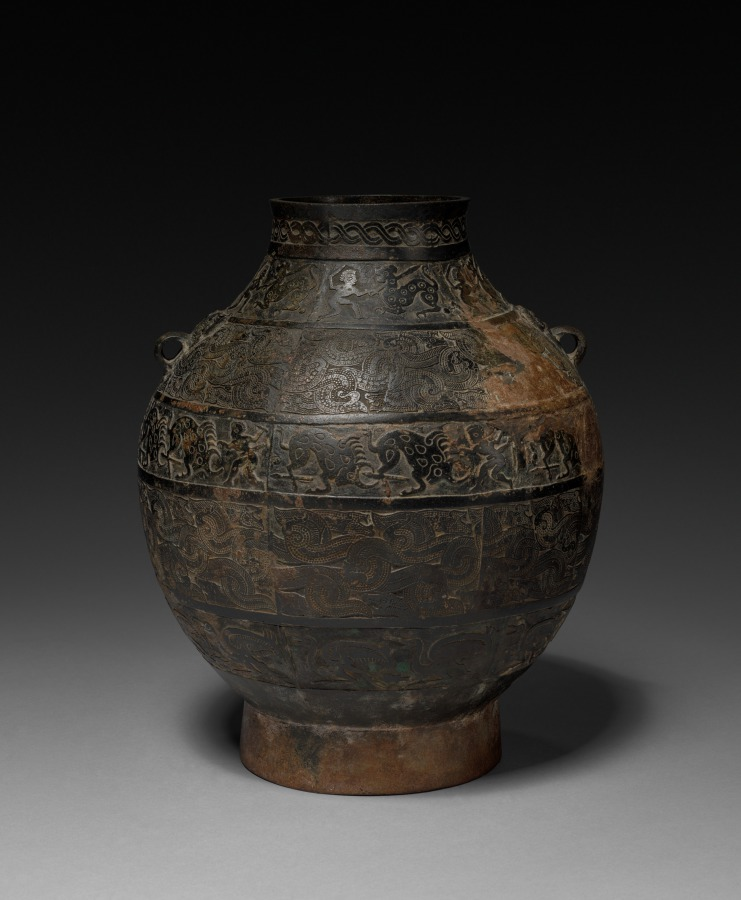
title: Hu (Jar)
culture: China, Eastern Zhou dynasty (770–256 BCE), Warring States period (475–221 BCE)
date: 481–221 BCE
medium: bronze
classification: Metalwork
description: The hunting scenes in flat, low relief on this vessel are among the earliest pictorial scenes in Chinese art, dating from the beginning of the Late Zhou period (481–221 BC). There are six horizontal bands of low relief designs across the body of the vessel. Each is composed of repeating motifs. The short slightly flaring neck has a narrow band of plait pattern, below which is a vivid hunting scene. The hunter holding a long spear and a sword faces off with a feline covered in circle patterns. The main body of the vessel is decorated with two wide bands of interlacing dragons, separated by a band with another hunting scene. This hunter faces two horned beasts whose rear leg has been pierced by a spear. The repeating pattern in the lowest band features two long-legged birds and a small fish.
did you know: On the vessel’s shoulders are applied taotie masks from which stem vertical loops for holding the vessel possibly with a rope.